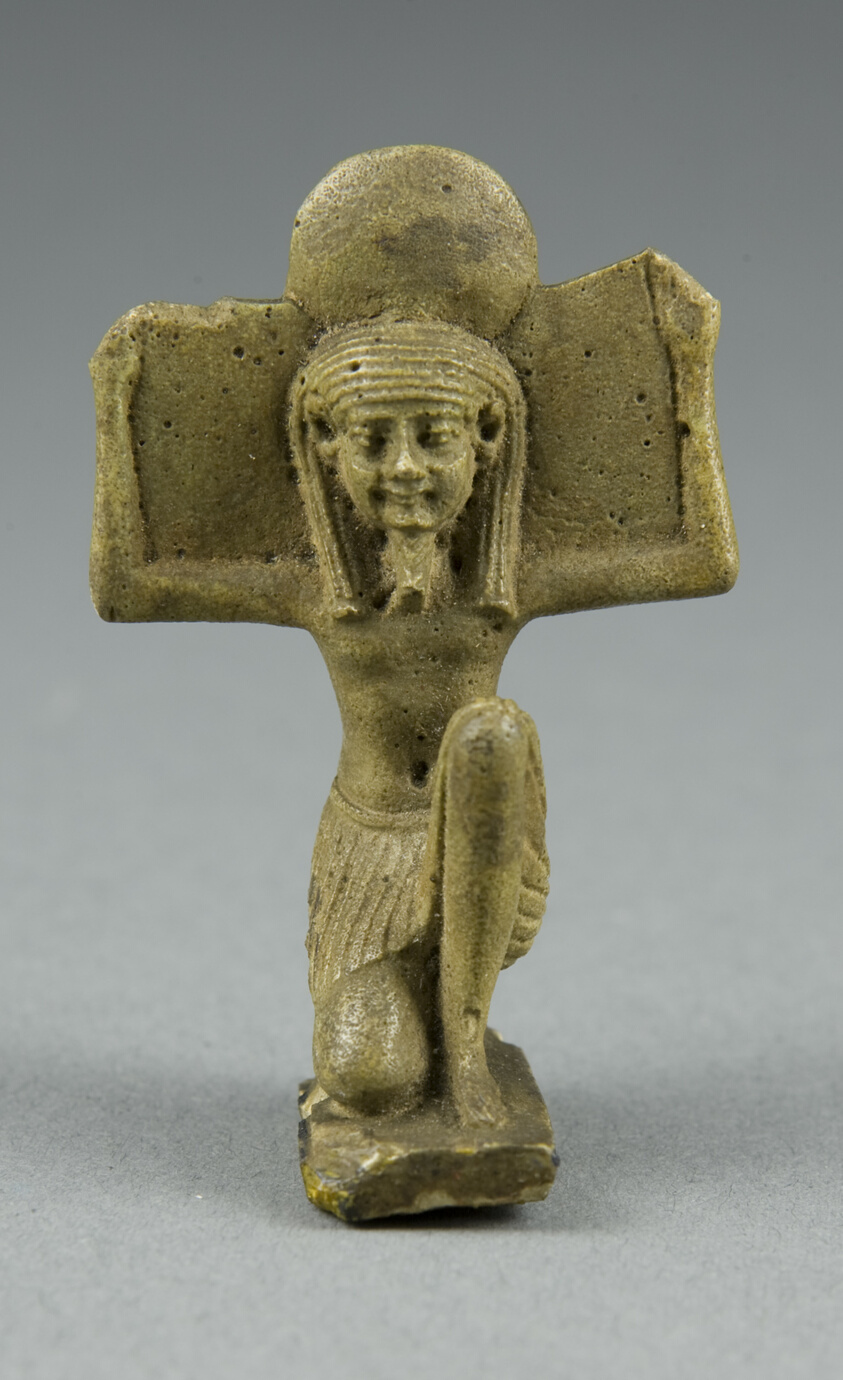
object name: Costume and Accessories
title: Amulet of the God Shu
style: egyptian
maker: Egyptian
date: Late Period, Dynasty 26 (664-525 BCE)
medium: Faience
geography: Egypt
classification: amulet; jewelry; ceramics; ancient art; costume; faïence (composite material)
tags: gods (deities)